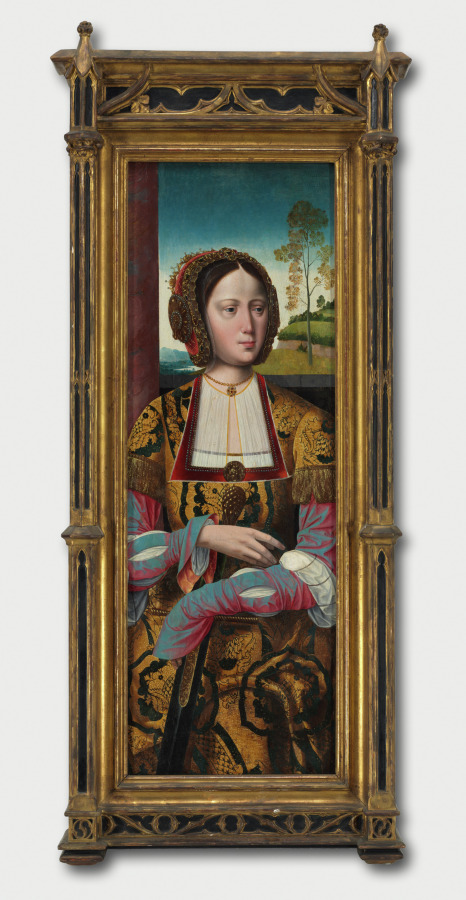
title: Saint Catherine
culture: Flanders, Bruges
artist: Master of the Holy Blood (Netherlandish)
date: c. 1520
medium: tempera on wood panel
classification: Painting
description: Saint Catherine holds the sword with which she was martyred. This painting and another in the collection (1942.633.2) were originally the wings of an altarpiece flanking a central panel, now lost, that may have depicted the Holy Family. The identity of this artist is unknown, but he is named for a painting in the Chapel of the Holy Blood in Bruges. Bruges flourished as an international commercial center through the 1400s and early 1500s. Among its residents were many foreign merchants and bankers who, along with the Burgundian court, patronized artists and attracted specialized craftsmen such as furriers, hatters, jewelers, and goldsmiths. Bruges’s artistic production in the 1400s included celebrated artists like Jan van Eyck, Petrus Christus, Hans Memling, and Gerard David who painted large altarpieces, small panels for private devotion, and portraits. Bruges also remained an important center for the production of illuminated manuscripts.